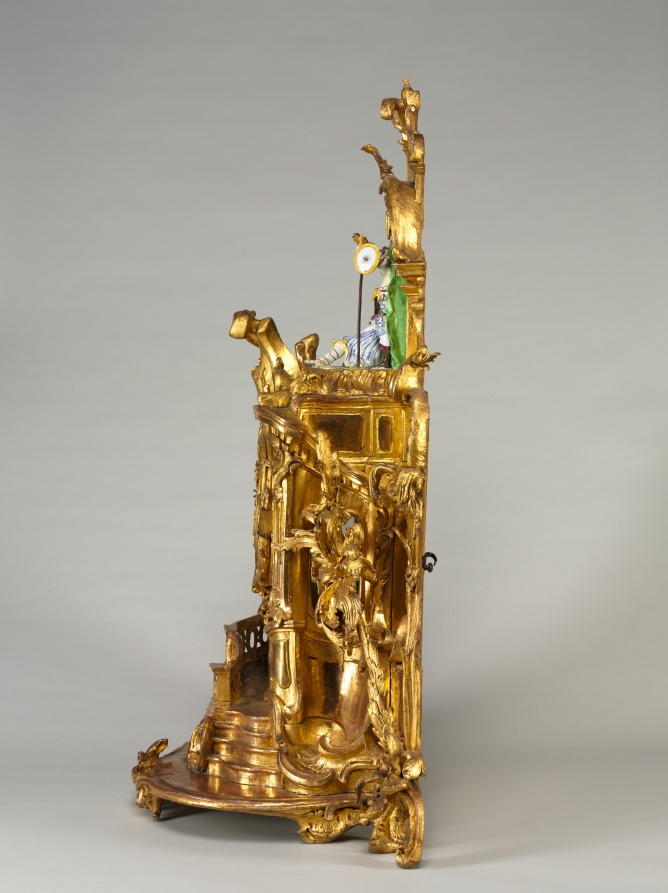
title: Clock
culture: Germany, 18th century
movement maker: Baumgartinger (German)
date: c. 1750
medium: carved and gilded wood, faience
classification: Furniture and woodwork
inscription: inscribed on face: Baumgartnger [sic] Mergentheim.